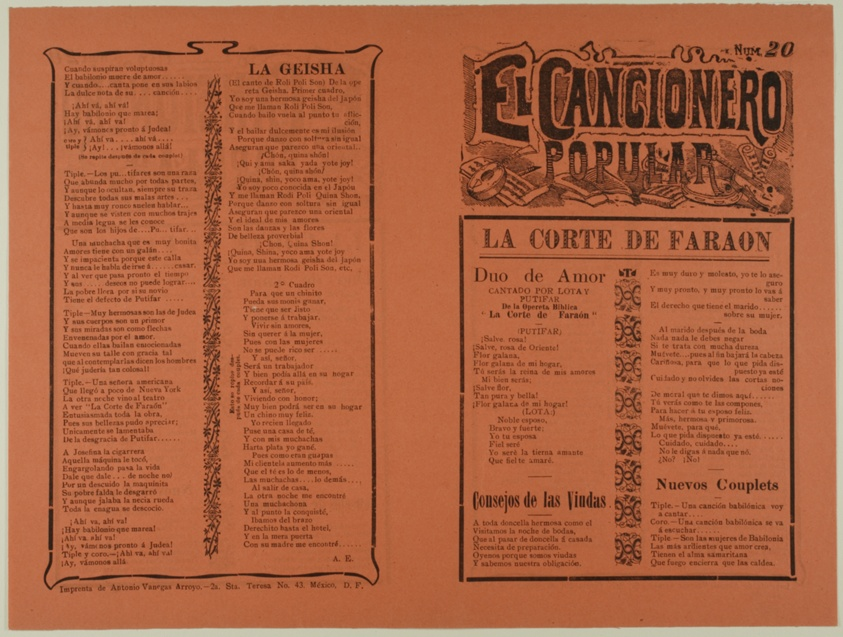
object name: Print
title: El cancionero popular, num. 20 (The Popular Songbook, no. 20)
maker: Unknown Artist; Mexican, 19th century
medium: Relief print on paper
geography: Mexico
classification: relief etching; print; prints and drawing